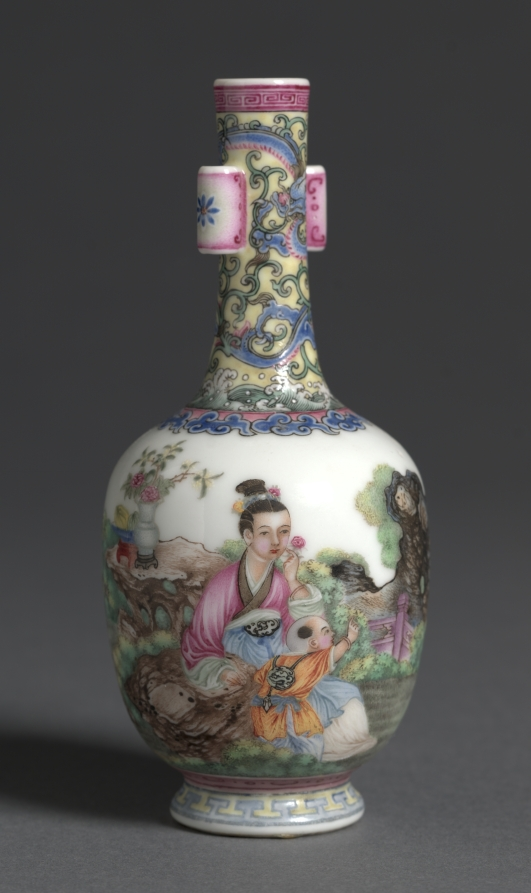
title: Vase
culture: China, Qing dynasty (1644-1911), Qianlong mark and reign (1736-95)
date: 1736–95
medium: Porcelain with decoration in colored fa-lang enamels, Guyuexuan ware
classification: Ceramic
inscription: 乾隆年製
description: The four-character mark on the base of this vase indicates that it was made in Jingdezhen and then sent to Beijing to be decorated in the imperial workshops by painters who were trained in using Western perspective and shading.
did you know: The child in orange has a bun above his ear, while the rest of his head is clean-shaven, like the other children’s.